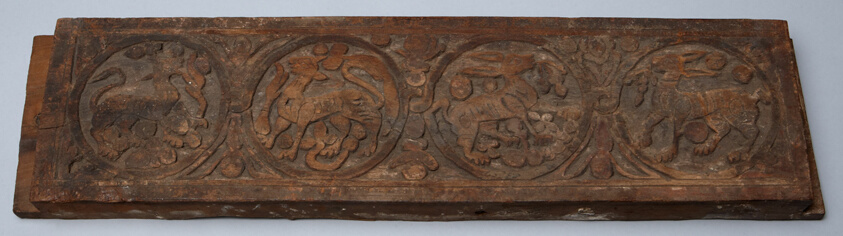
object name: Architectural fragment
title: Architectural Fragment with Relief Carving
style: coptic (period)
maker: Byzantine; Egypt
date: 5th–6th century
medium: Wood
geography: Ancient Egypt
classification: architectural fragment; wood; sculpture; asian art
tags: animals